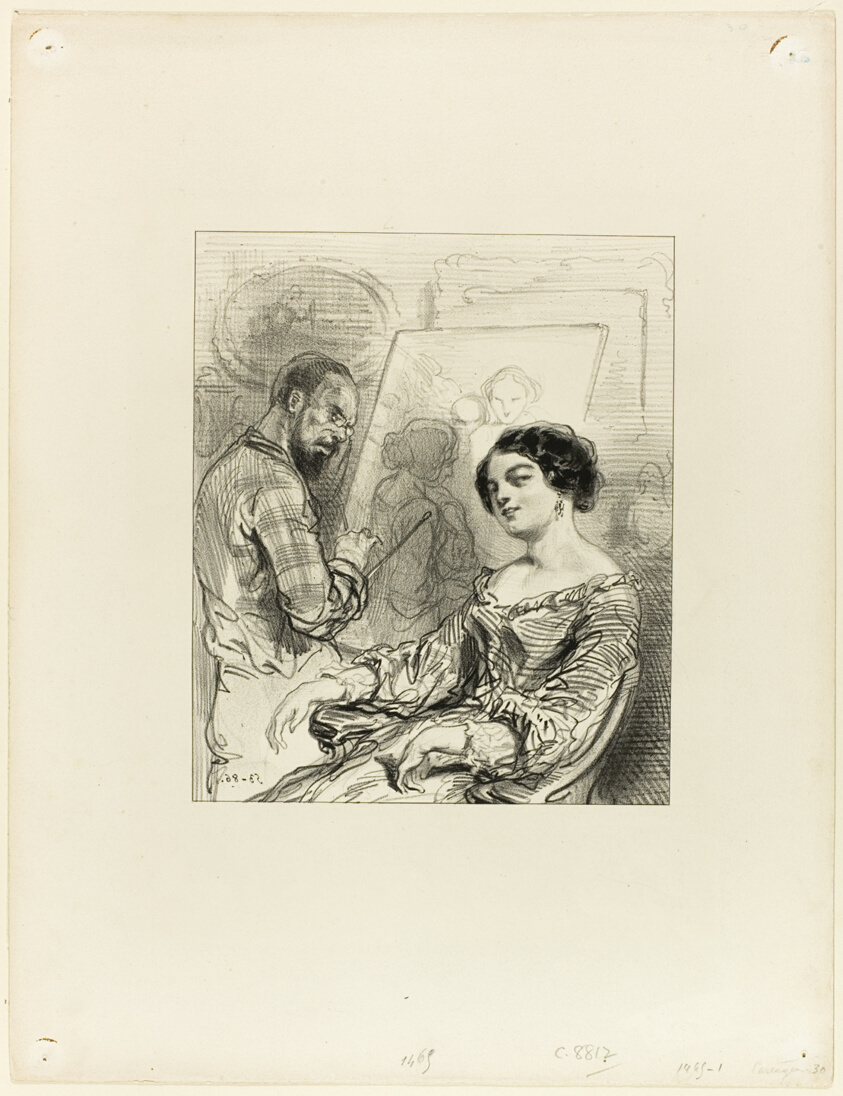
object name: Print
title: Les Partageuses: Thursday you dined at Vachette's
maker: Paul Gavarni (French, 1804-1866)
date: 1853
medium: Lithograph in black on cream wove paper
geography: France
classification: lithograph; print; prints and drawing